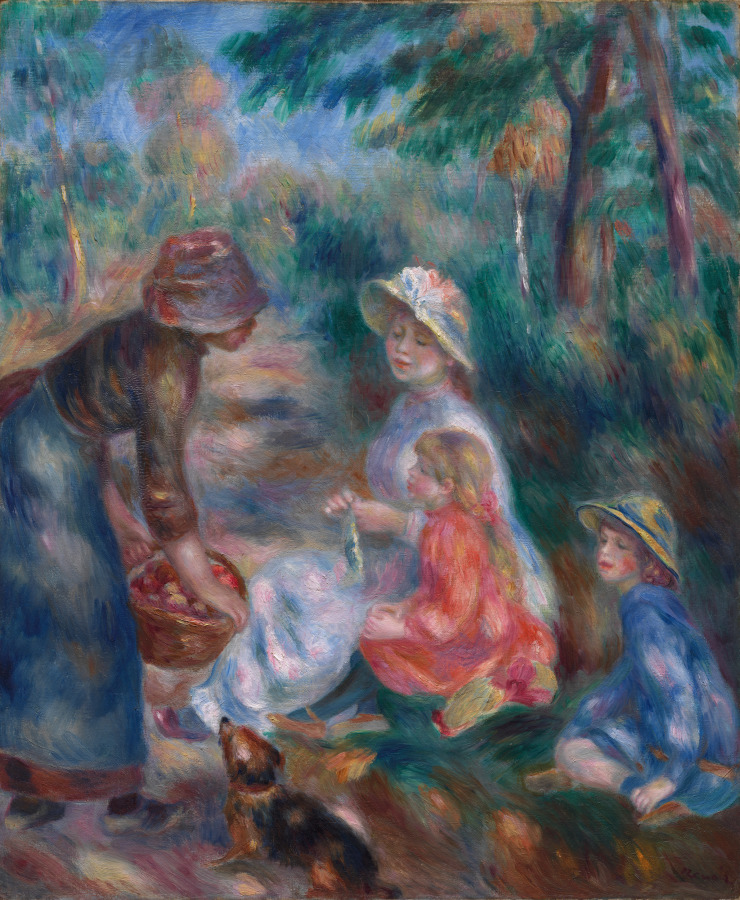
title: The Apple Seller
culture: France, 19th century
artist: Pierre-Auguste Renoir (French, 1841–1919)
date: c. 1890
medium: oil on fabric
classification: Painting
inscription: Signed center right: a. renoir / 1864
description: This painting depicts a young country girl offering apples to Renoir's wife, Aline. The boy in the straw hat may be the artist's nephew, Edmond, but the young girl with the ribbon in her hair has not been identified. Bathed in soft, dappled sunlight, the figures are united through the fluid brushstrokes that cover the canvas. The leaping dog provides an accent of humor and motion in an otherwise tranquil scene. The picture was probably completed at Essoyes, in eastern France.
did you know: Using repetitive, soft, light-of-touch brushstrokes to form patches of color, Renoir creates a sense of dappled light that reflects on the ground and caresses the figures, giving the painting an ethereal, dreamlike quality.